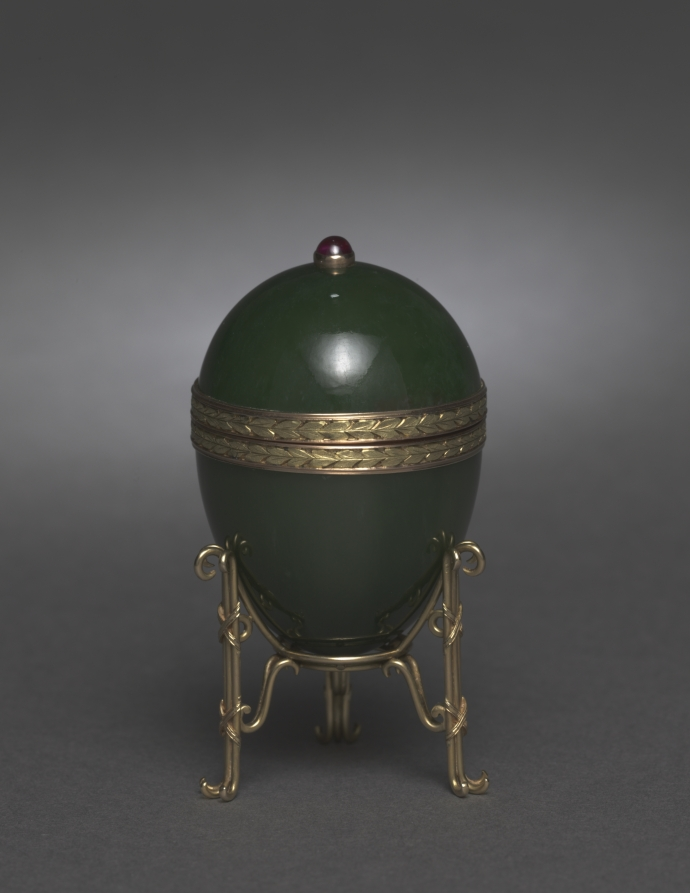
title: Easter Egg on Stand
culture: Russia, St. Petersburg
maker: attributed to House of Fabergé (Russian, 1842–1918)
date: c. 1900–1910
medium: jade mounted in gold, cabochon rubies, jade and purpurine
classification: Miscellaneous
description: Seated on an intricate miniature stand, this polished nephrite (jade) egg features a cabochon ruby on top and a hinged gold-leaf border that reveals the interior. Within the egg, on a bed of gold, is a nest of even smaller eggs. Each red, white, and green egg mirrors an aspect of the larger egg, recalling the cleverness and meticulous details found within every House of Fabergé object.